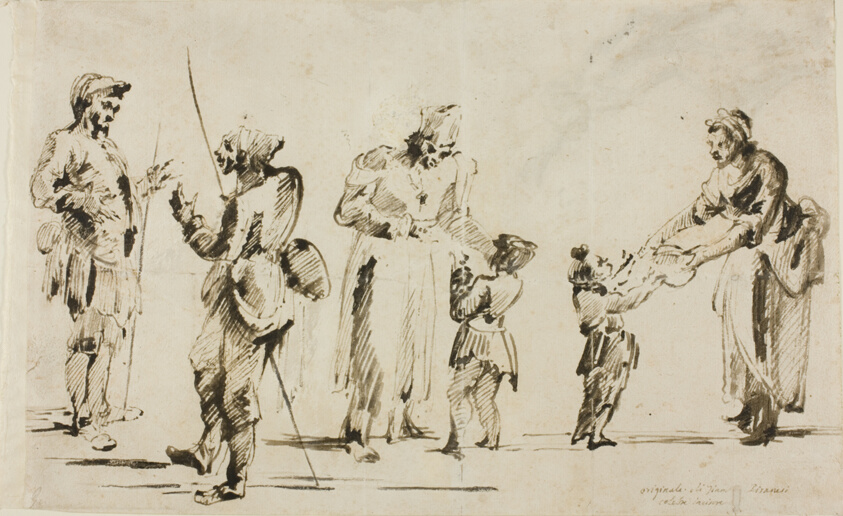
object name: Drawing and Watercolor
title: Sheet of Sketches: Six Figures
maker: Giovanni Battista Piranesi (Italian, 1720-1778)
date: 1768/78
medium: Pen and black and gray ink on ivory laid paper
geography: Italy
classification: drawings (visual works); prints and drawing